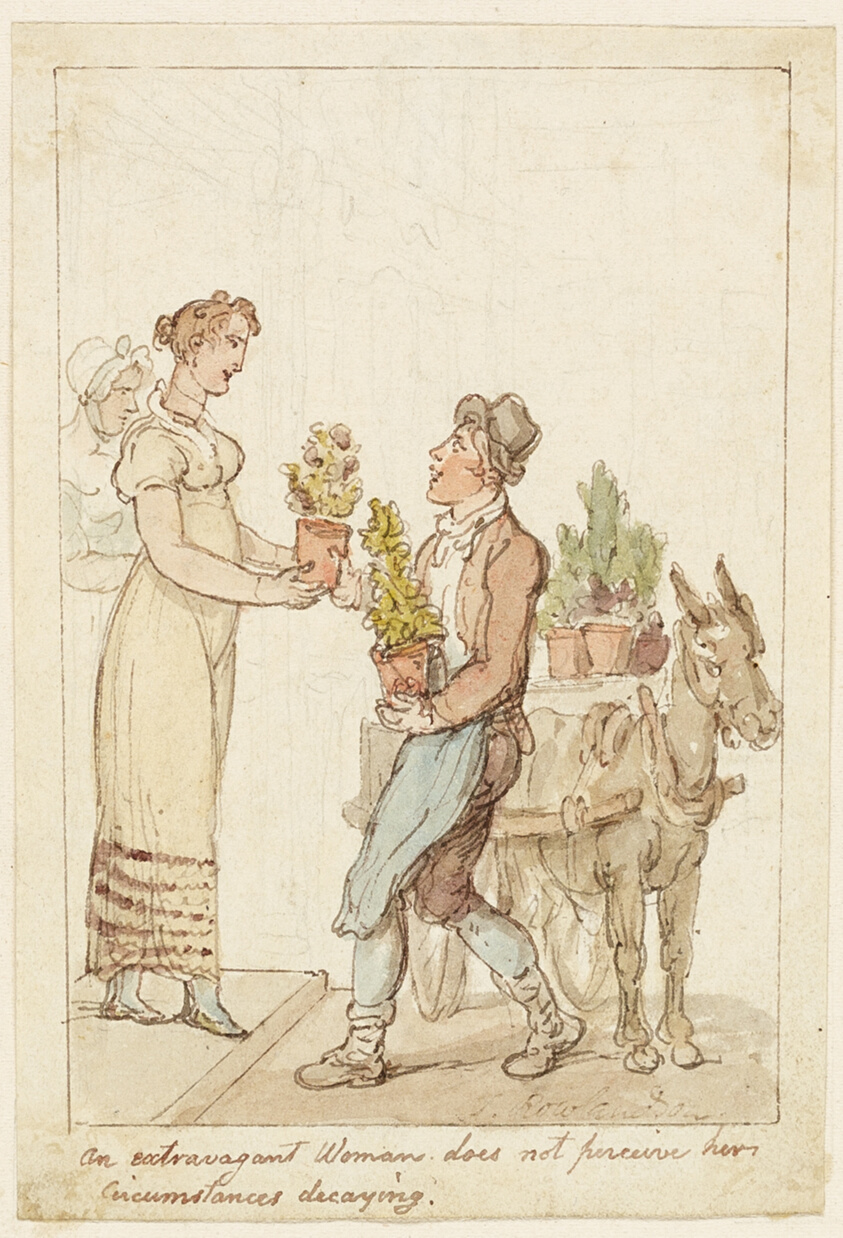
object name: Drawing and Watercolor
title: The Extravagant Woman Does Not Perceive Her Circumstances Decaying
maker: Thomas Rowlandson (English, 1756-1827)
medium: Pen and brown ink with brush and watercolor, over graphite, on ivory wove paper, tipped onto ivory wove paper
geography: England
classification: watercolor; drawings (visual works); prints and drawing